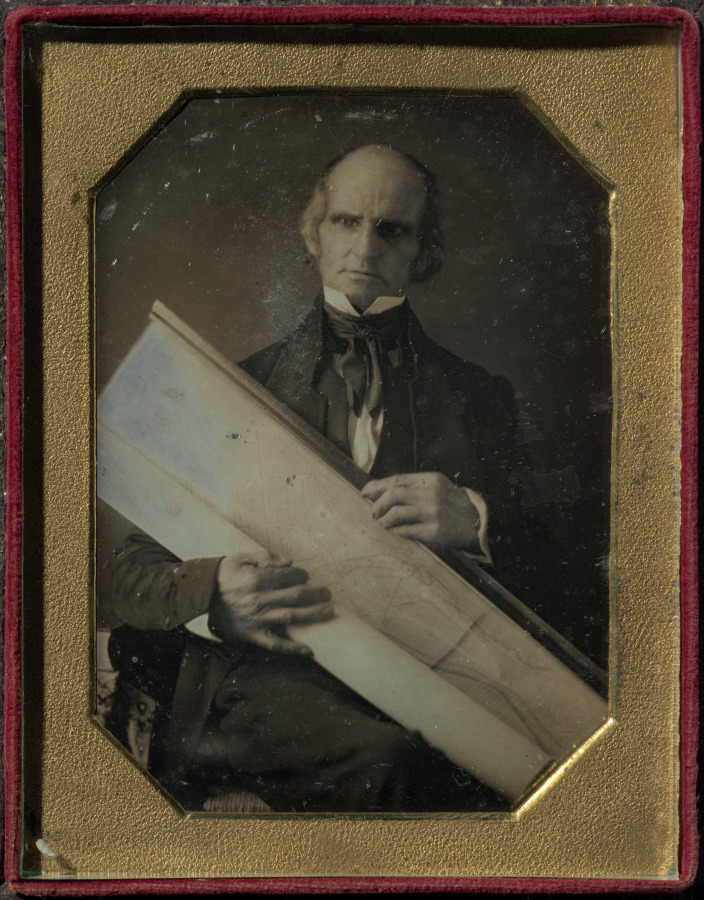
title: The Map Maker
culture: America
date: c. 1843–45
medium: daguerreotype, quarter plate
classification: Photograph